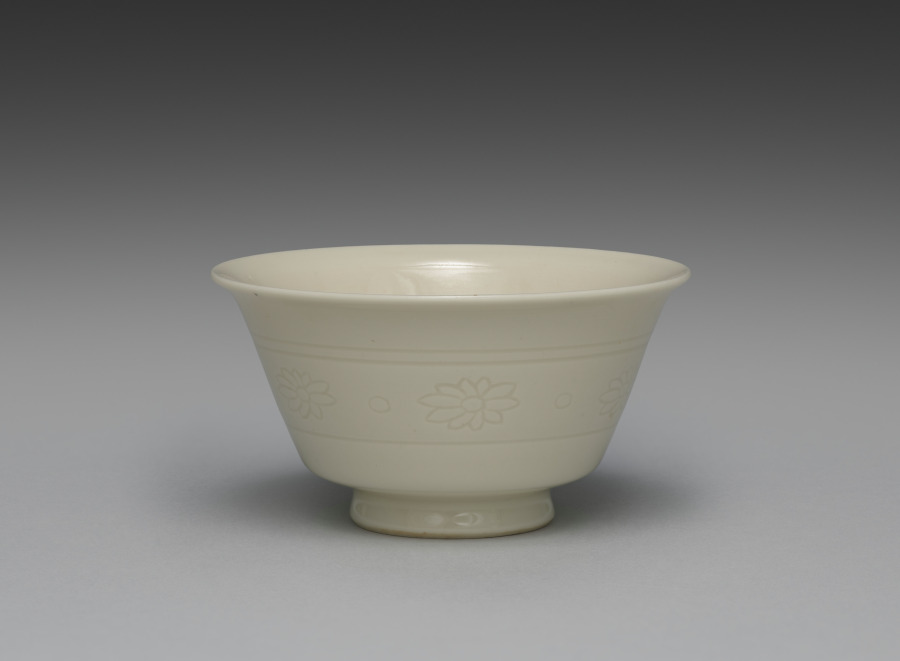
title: Teacup from Teacups with Floral Band Motif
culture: Japan, Meiji period (1868–1912)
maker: Seifū Yohei III (Japanese, 1851–1914)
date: 1893–1914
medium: One from a set of five cups; porcelain with incised decoration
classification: Ceramic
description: The five sencha teacups in this set are decorated with incised flowers and dots between a double band at the top and a single band at the bottom. They are in Yohei III’s creamy taihakuji body and glaze. In their motifs, they are quite similar to an incense burner by Yohei III (see CMA 2022.180), but the flowers are even more simple in design, with no open circle at the center. A label affixed to the side of the box refers to them as “sencha cups in emulation of Korean white [ware].” The reference to Korean ware indicates that even though Yohei was more directly inspired by Qing-dynasty wares from the Dehua kilns in Fujian Province in developing his porcelain clay and glaze for works such as these, the general understanding of the continental models still placed them, at least in terms of color, among pieces broadly associated in Japan with Korean white wares. The delicate cups are thinly potted, so they have a highly desirable translucency.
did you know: The delicate cups in this set are thinly potted, so they have a highly desirable translucency.